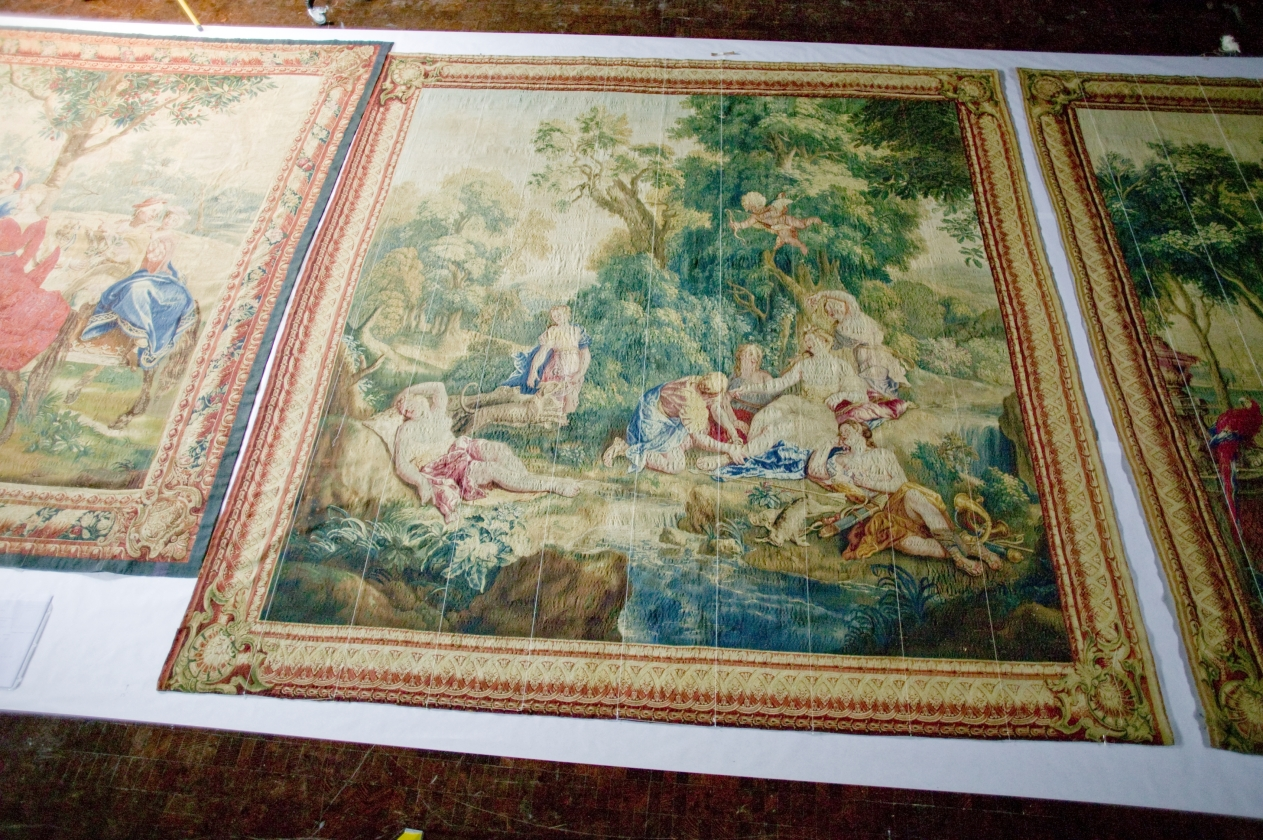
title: Diana's Return from the Chase (from Set of Ovid's Metamorphoses)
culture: France, 18th century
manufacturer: Gobelins Manufactory (France, Paris, est. 1662)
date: 1704–1731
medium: tapestry weave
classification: Tapestry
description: This tapestry’s elaborate border emulates a gilt picture frame, a key characteristic of eighteenth-century Gobelins tapestries. It portrays the goddess Diana at two distinct moments, during and following the hunt, the first accompanied by three dogs, and the second reclining among five attendants. The figures are positioned in a lush landscape near a small stream. A putto, poised to place an arrow in his bow, hovers above Diana. Goddess of the hunt and associated with wild animals and the moon, Diana can be identified by the crescent worn above her forehead. The dead hares indicate a successful hunt.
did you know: During the French Revolution, Gobelins tapestries were sometimes disassembled to harvest the gold threads.